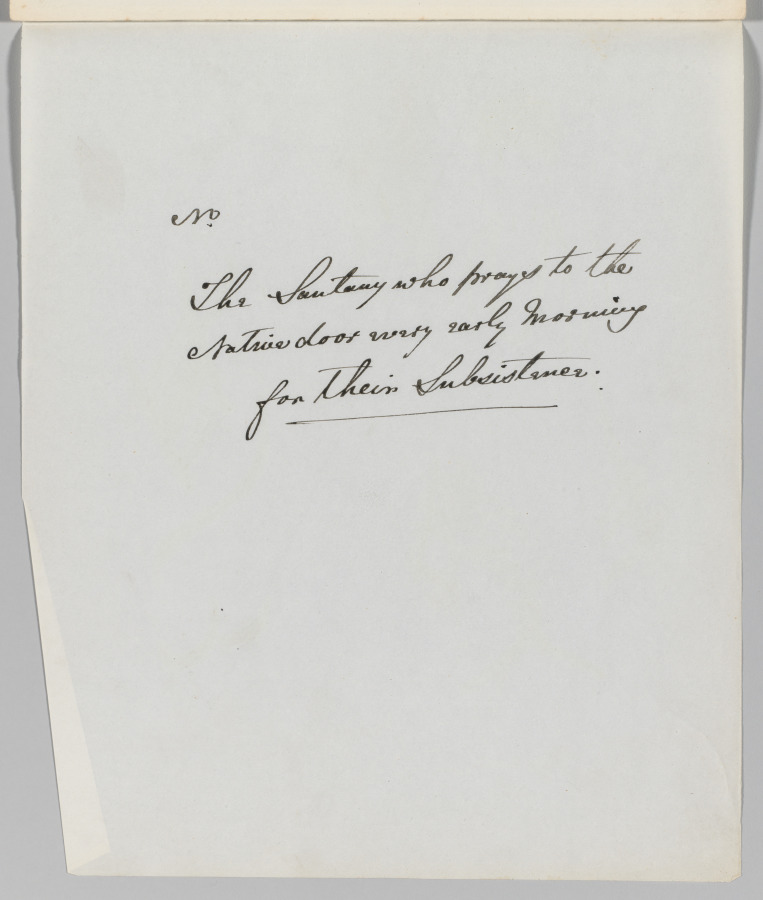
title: A Couple (from the series Costumes and Professions)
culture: South India, Tanjore, 19th century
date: mid-1800s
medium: Gum tempera, ink, and gold on paper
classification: Painting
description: This work was made by Indian artists for a member of the British East India Company. It was painted in the southern style of Company school painting, which is distinguished by its bold outlines, saturated color, and heavy application of gold. The priest on the right bears the sectarian markings of a follower of the Hindu god Vishnu on his forehead, chest, arms, and flag. A 19th-century British inscription on its surviving fly sheet, a protective cover of tissue paper, states that this priest made his living by praying to the “native doorway” early every morning. The survival of this commentary reveals how British collectors used these apparently objective depictions of costumes and professions to implicate Indian holy men in strange or even charlatan behavior.